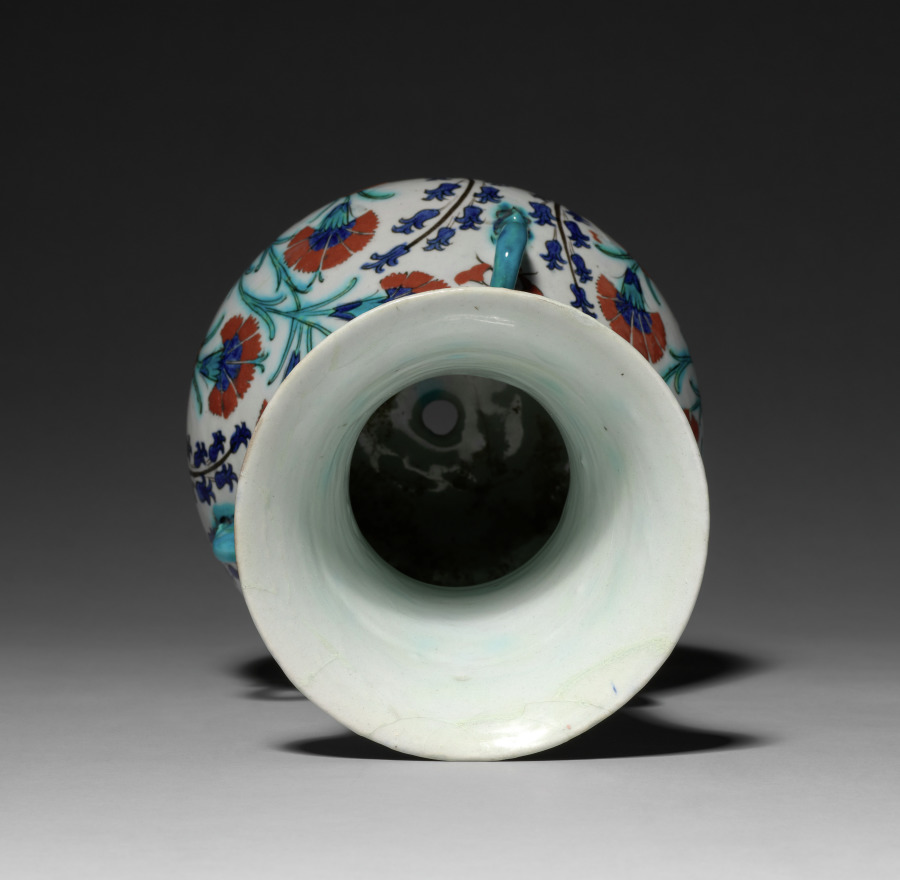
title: Mosque Lamp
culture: Turkey, Iznik, Ottoman period (1299–1922)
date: 1585–95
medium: Fritware with underglaze design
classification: Ceramic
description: Mosque lamps typically functioned as a lampshade, containing an oil lamp inside. Due to the opacity of this Ottoman lamp, it is likely that its primary function was not illumination. Instead, it would have been hung from chains in a mosque or mausoleum to add to the beauty of the space. This lamp is decorated with bright red carnations and blue hyacinths with additional floral and vegetal elements. The turquoise loops would have served for suspension from the ceiling. It is also possible that lamps like this were used as acoustic devices, softening the echo of prayer and discussion within the mosque’s halls.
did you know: Fritware is made of ground quartz, glass frit (partially fused glass), and a small proportion of fine white clay to approximate the light color and weight of Chinese porcelain.